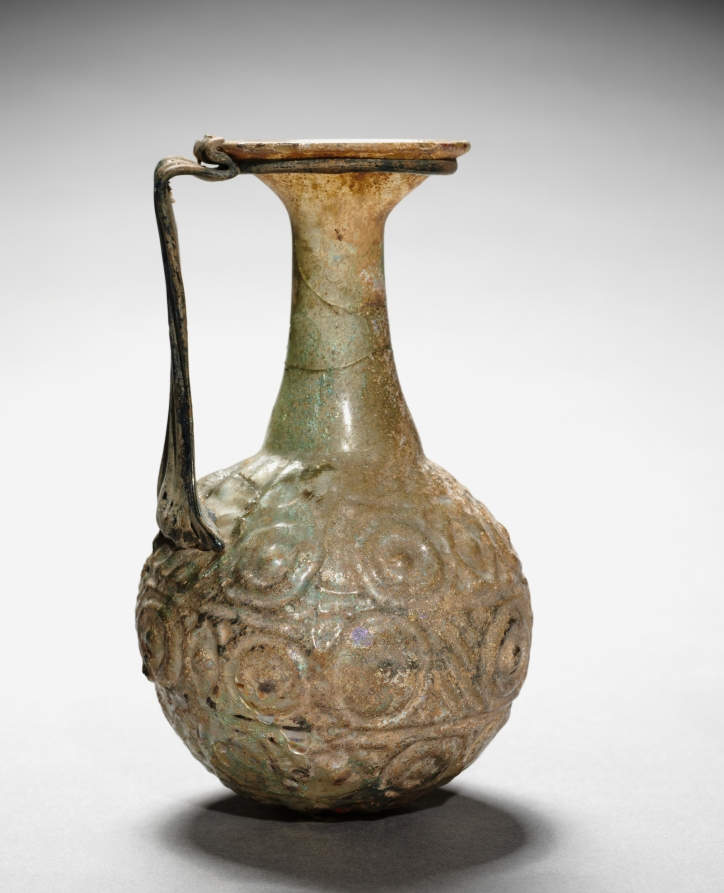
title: Pitcher with Handle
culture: Roman, Syro-Palestinian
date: 300s CE or later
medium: glass, mold-blown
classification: Glass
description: Featuring a globular mold-made body with three bands of geometric ornament (mostly concentric circles) in low relief, this pitcher could have been used for pouring water, wine, or other liquids. The separately made handle, decorated with four vertical ribs, is attached below the wide mouth by means of a coil.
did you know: Even the underside of this pitcher’s base is decorated, with a mold-made sunburst pattern.